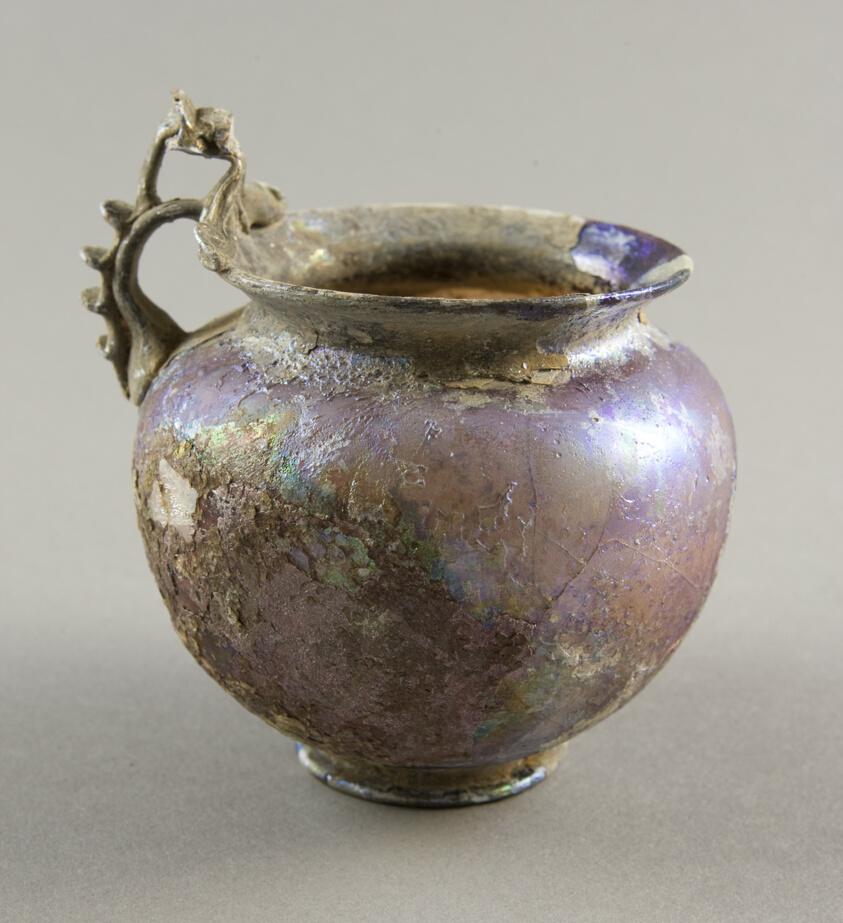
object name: Vessel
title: Jar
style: syrian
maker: Roman, Levant or Syria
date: 3rd-5th century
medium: Glass, blown technique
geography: Syria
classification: vessel; glass; ancient art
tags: containers